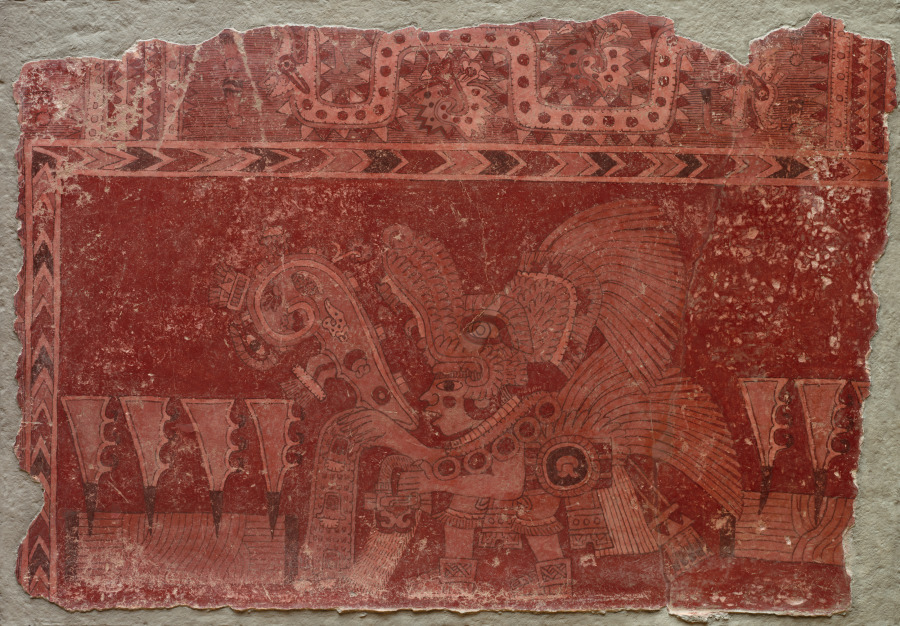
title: Mural Fragment with Elite Male and Maguey Cactus Leaves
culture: Central Mexico, Tlacuilapaxco apartment compound(?), Teotihuacán style, Classic Period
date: 500–550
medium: fresco on wall fragment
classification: Painting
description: This richly dressed elite male belonged to a row of identical figures who processed along the walls of a patio in one of Teotihuacán’s wealthy apartment compounds. He offers a chant or prayer, materialized in a mouth scroll, along with a flower-filled libation that cascades from one hand. In the other hand, he carries an incense bag. The thorny spines of the maguey cactus, in front and behind, may allude to the offering of precious blood and a ritual beverage made from the cactus’s sap (pulque, a less refined form of tequila). The spines are thrust into objects that may represent bundles or plots of land.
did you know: This fragment is from a larger composition that covered the walls of a patio at Teotihuacan.